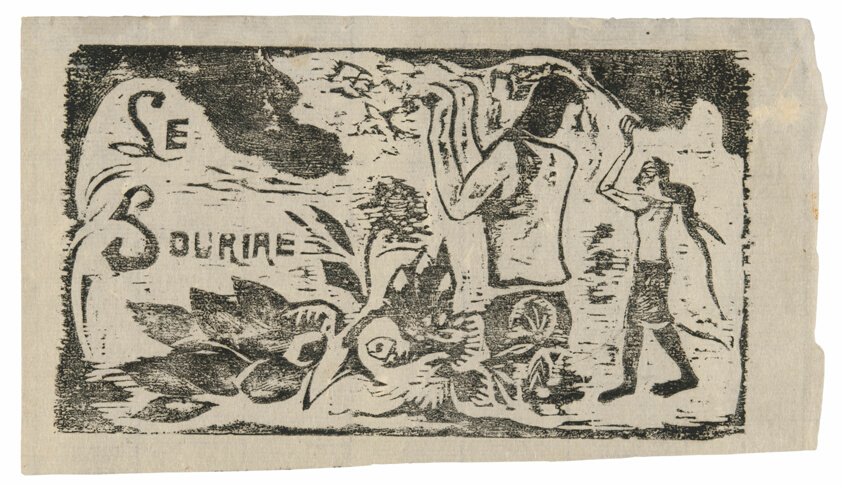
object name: Print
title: Tahitians, Flowers, and Leaves, headpiece for Le sourire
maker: Paul Gauguin (French, 1848-1903)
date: 1899/1900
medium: Wood-block print in black ink on thin ivory laid Japanese paper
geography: France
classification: woodcut; print; prints and drawing